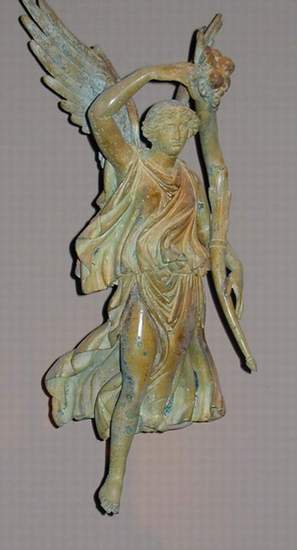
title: Victory with Cornucopia (Chariot Attachment)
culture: Italy, Rome, Imperial, later Julio-Claudian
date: 40–68 CE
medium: bronze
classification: Sculpture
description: In Roman times, the arrival of Winged Victory—touching down to earth, her drapery flying behind her—was a moment not just of military conquest, but was the first step toward peace and prosperity.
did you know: The cornucopia held by this Winged Victory overflows with fruits, grains, and other signs of abundance.